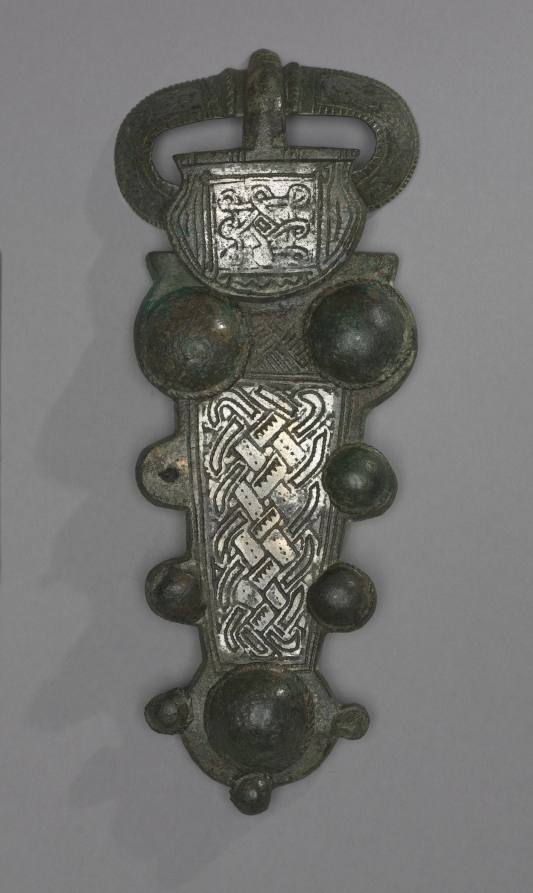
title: Buckle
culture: Frankish, Migration period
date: 600s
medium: bronze and silver overlay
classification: Jewelry